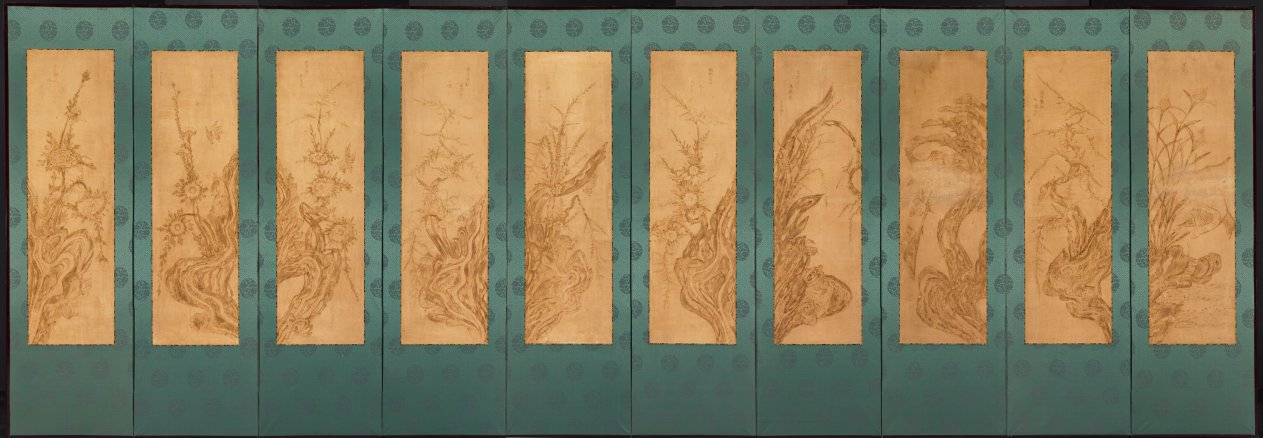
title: Birds and Flowers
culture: Korea, Joseon dynasty (1392–1910)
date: late 1800s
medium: Ten-panel folding screen with designs and inscriptions burnt into paper (pyrography)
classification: Painting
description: The image depicted on this folding screen is not executed in ink, but rather a method called “pyrography" or "nakhwa,” a technique of burning the surface of materials ranging from wood to paper with the delicately controlled application of a heated metal tool. This technique became widely popular in the 19th century. Scorched marks here replace brush strokes. Nakhwa method is now designated as a Korean Intangible Cultural Asset by the Korean government.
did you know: The painting is done by a pyrography method, a technique of burning the surface of materials with a heated tool.